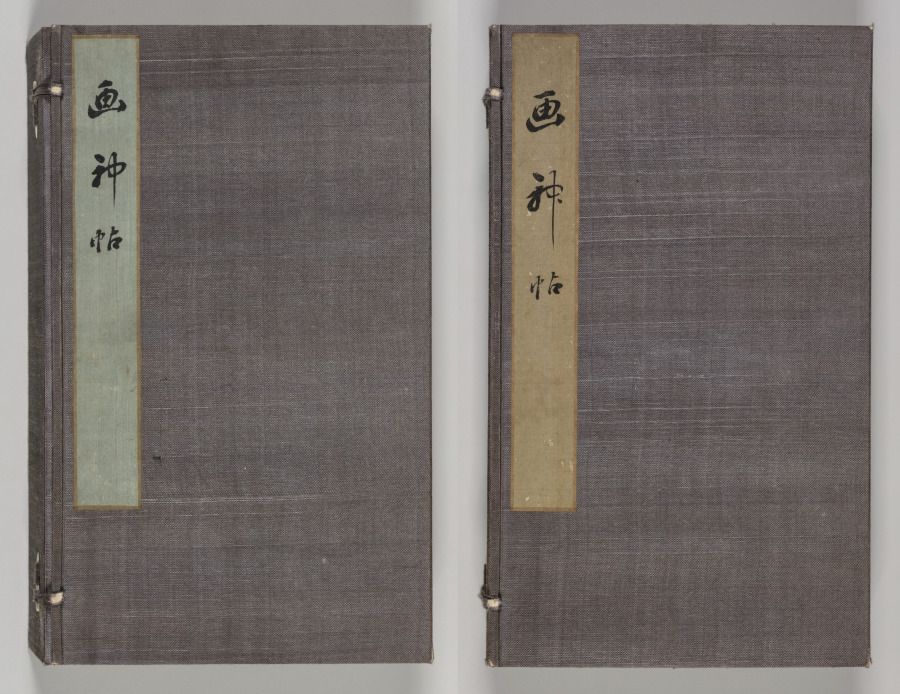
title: Reverberations of Taiga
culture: Japan, Edo period (1615–1868)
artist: Aoki Shukuya (Japanese, d. 1802)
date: mid-1700s–1802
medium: set of two albums of 36 double-leaves each; ink, or ink and light color on paper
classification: Portfolio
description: Traditionally, young painters in Japan began their studies with an established master painter. The master's compositions invariably became models that the apprentice copied to learn various ink and brush techniques. Shukuya was a pupil of the famous Kyoto artist Ike Taiga, whose style is reflected in these sketches of rocks, trees, and mountains.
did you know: Aoki Shukuya was a top student of painter Ike Taiga (1723–1776) and took responsibility for Taiga’s stylistic legacy.